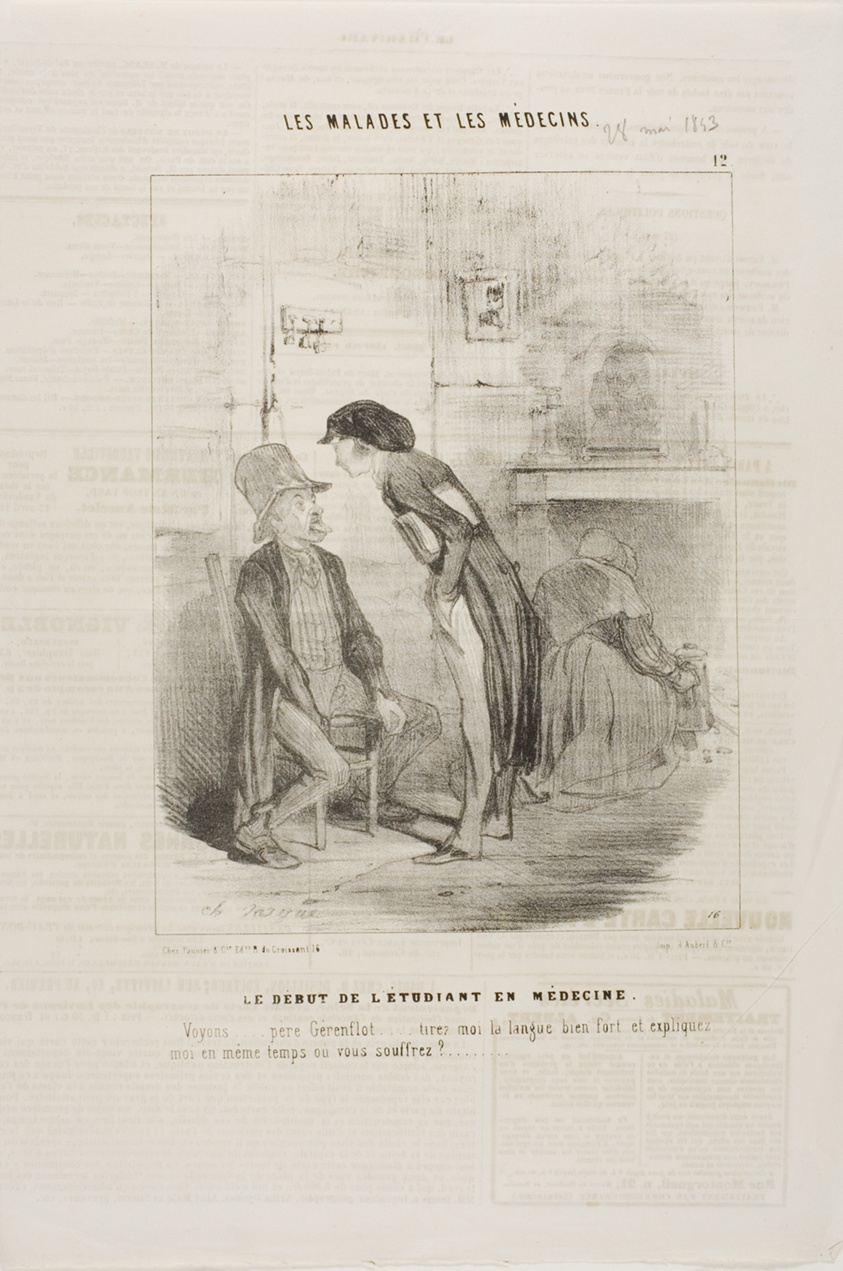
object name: Print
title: A Medical Student Starting Out (plate 12)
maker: Charles Émile Jacque (French, 1813-1894)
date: 1843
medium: Lithograph in black on ivory wove paper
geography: France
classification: lithograph; print; prints and drawing